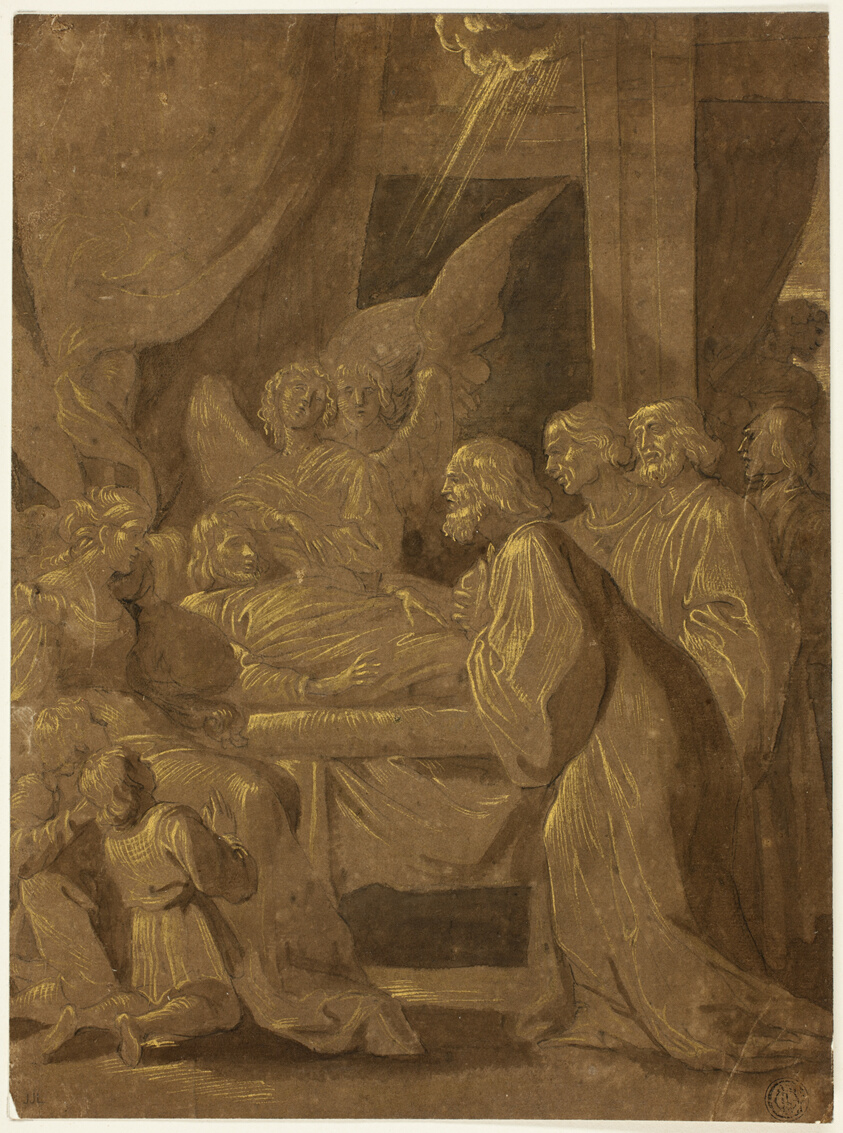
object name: Drawing and Watercolor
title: Healing of the Paralytic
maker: Possibly Johann Gottlieb Prestel (German, 1739-1808); possibly after Jacopo Ligozzi (Italian, 1547-1626)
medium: Graphite and brush and brown wash, with pen and gold ink, on laid paper, laid down on off-white paper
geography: Germany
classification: ink or chalk wash; drawings (visual works); prints and drawing